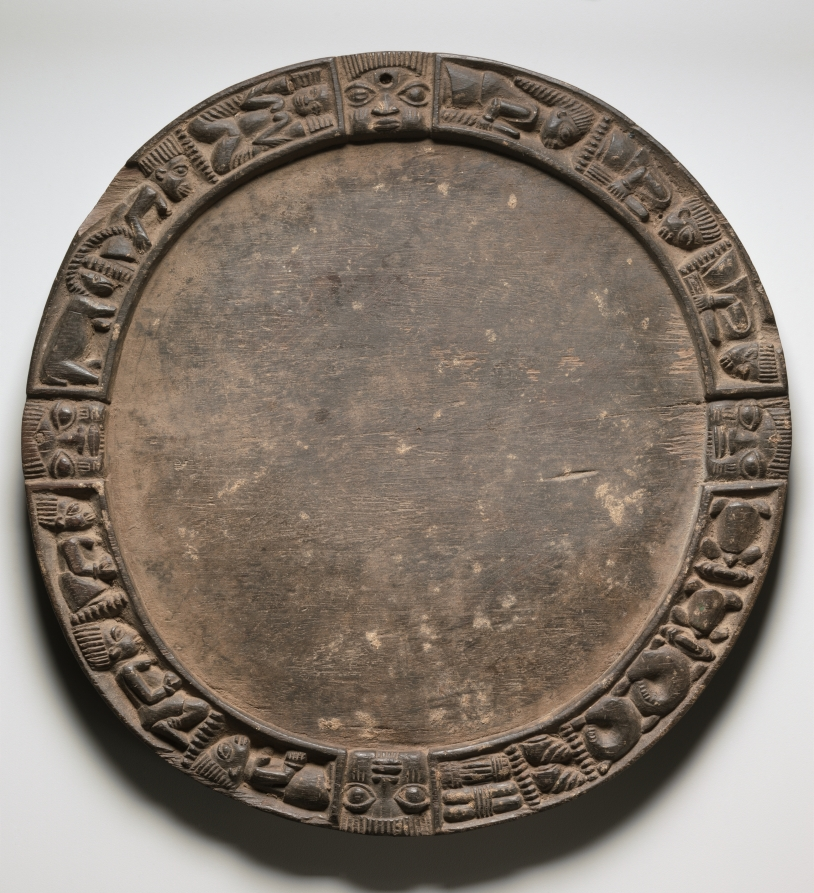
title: Divination Tray (ọpọ́n Ifá)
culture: Africa, West Africa, Nigeria, Yorùbá-style maker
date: 1900s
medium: wood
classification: Sculpture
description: In Ifa divination, the priest sprinkles wood powder over the smooth inner surface of a wooden tray. As the sacred palm nuts are cast, the diviner records the results by marking the powder with an ivory tapper. The markings reveal the proper chants to be recited. The four faces carved on the tray's rim portray Esu, who bears sacrifices to the gods, and oversees the divination ritual. The kneeling figures are probably petitioners; one has a leashed animal for sacrifice. Other motifs include turtles, curled mudfish, and snails. These creatures, which can survive on land or in water, are symbols of the diviner's ability to connect the human and spiritual realms.